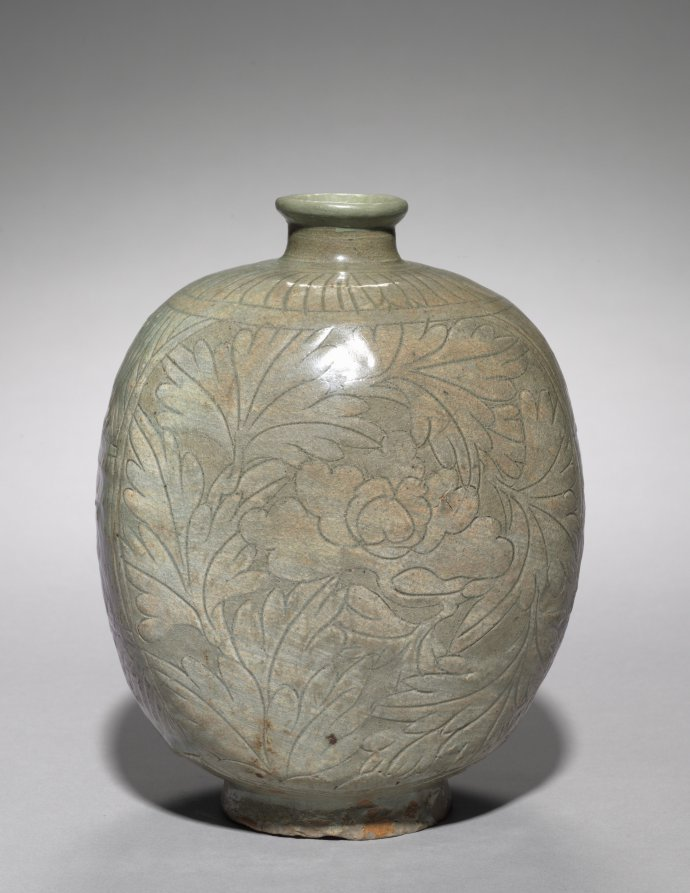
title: Wine Flask with Incised and Sgraffito Peony Design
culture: Korea, Joseon dynasty (1392–1910)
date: 1500s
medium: stoneware with incised design (Buncheong ware)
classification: Ceramic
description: Produced in both central and provincial kilns during during the 1400s–1500s, buncheong (literally means "powdered green"), like this wine flask commonly feature gray-green glaze due to the usage of less processed and refined clay high in iron. Many experimental techniques such as white slip, inlay, stamping, and incising, which had been explored and perfected in the Goryeo period, were also adopted for buncheong pottery. The artist for this work extensively used the incising technique to draw both floral and abstract patterns.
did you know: The term buncheong, which refers to this type of pottery, means "powdered gray-green glazed ceramics.”